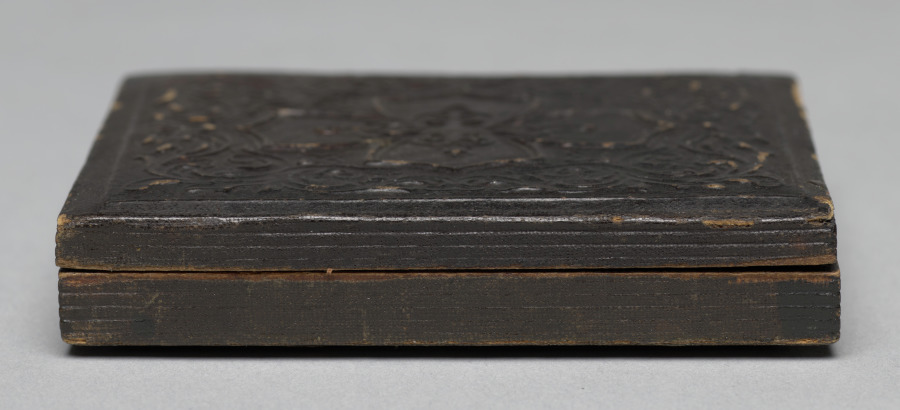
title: Civil War soldier with painted bivouac background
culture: America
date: c. 1861–65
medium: ambrotype, sixth plate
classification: Photograph